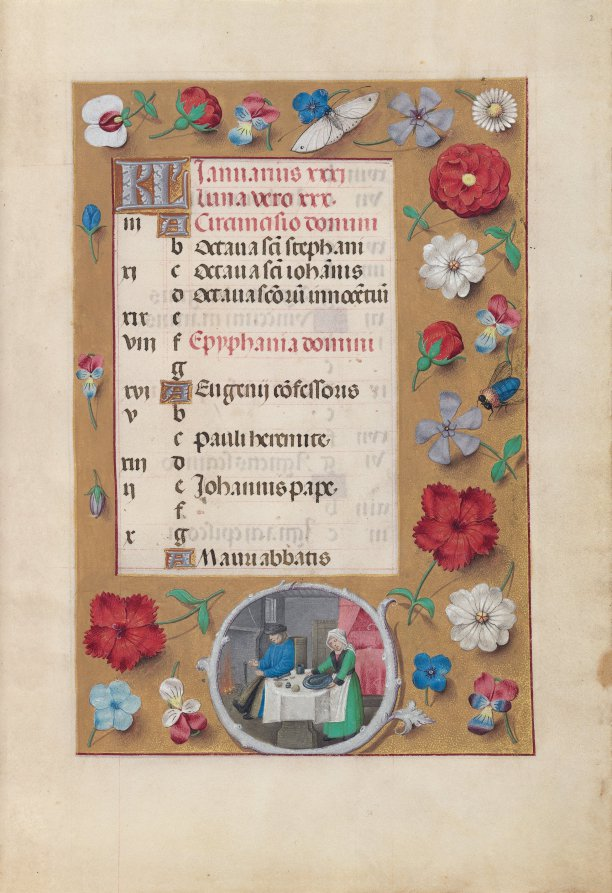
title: Hours of Queen Isabella the Catholic, Queen of Spain: Fol. 2r, January - Feast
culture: Flanders, Ghent and Bruges, late 15th century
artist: Master of the First Prayerbook of Maximillian (Flemish, c. 1444–1519)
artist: and Associates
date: c. 1500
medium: ink, tempera, and gold on vellum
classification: Bound Volume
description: This manuscript was illuminated by a circle of at least five highly organized manuscript painters active in the Flemish cities of Ghent and Bruges. The principal illuminator was Alexander Bening, who painted the majority of the book's miniatures. Manuscripts produced by this circle of artists are renowned for the decoration of their borders, which typically feature a rich variety of realistically painted flowers, birds, and butterflies. This prayer book, called a book of hours, was intended not for a cleric but for the private devotions of a lay person—in this case, Isabella the Catholic, Queen of Spain (1451–1504); her coat of arms embellishes the book's frontispiece. It is unlikely that the book was commissioned by the Queen herself; rather, she probably received it as a diplomatic gift from someone courting her patronage, perhaps Cardinal Francisco Jimenez de Cisneros. A Franciscan friar, Jimenez was dependent upon Isabella for his advancement, first to the post of Queen's confessor in 1492, and then to Archbishop of Toledo in 1495.